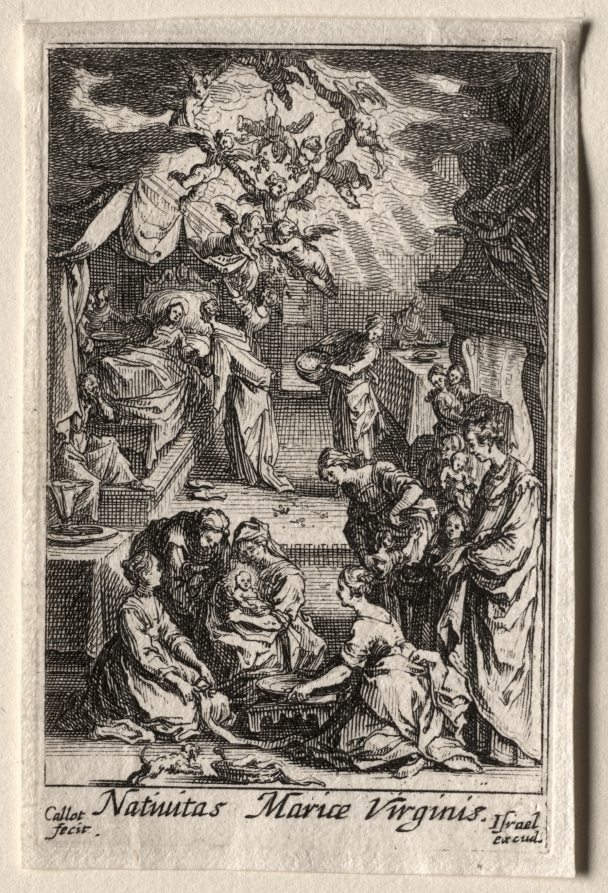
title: The Life of the Virgin: The Birth of the Virgin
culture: France, 17th century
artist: Jacques Callot (French, 1592–1635)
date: ca. 1633–34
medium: etching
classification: Print